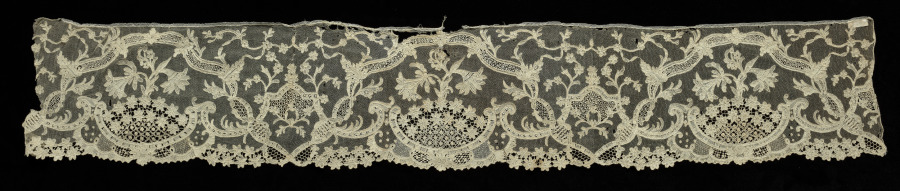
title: Lace Flounce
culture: Italy, Burano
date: 1900–1943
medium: Linen: needle lace (Burano Point)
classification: Lace